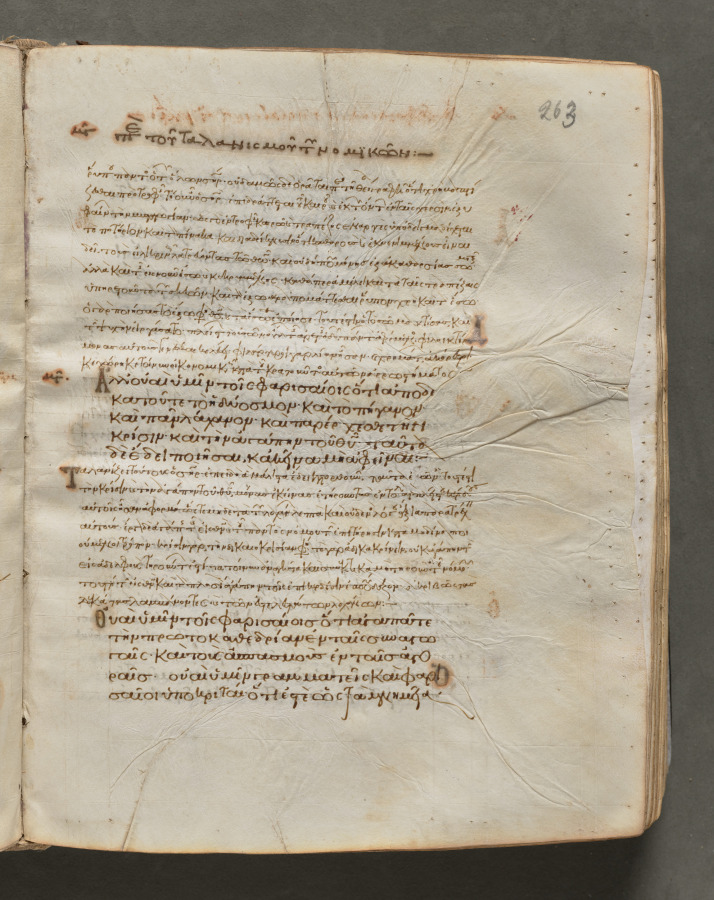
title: Text, folio 263 (recto), from a Gospel Book with Commentaries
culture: Byzantium, Constantinople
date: c. 1000–1100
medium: ink, tempera, and gold on vellum; leather binding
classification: Bound Volume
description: Each of the four gospels in this book opens on a page with brilliantly illuminated borders depicting the author of the text as well as birds—principally peacocks, symbols of the immortality of the soul—and fountains, representing the fountain of life and the salvation of the soul. This volume consists of 428 leaves with texts in Greek. Its level of sophistication suggests that it was probably written and decorated in a monastery in Constantinople.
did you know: Gospel books were carried in procession through Byzantine churches.